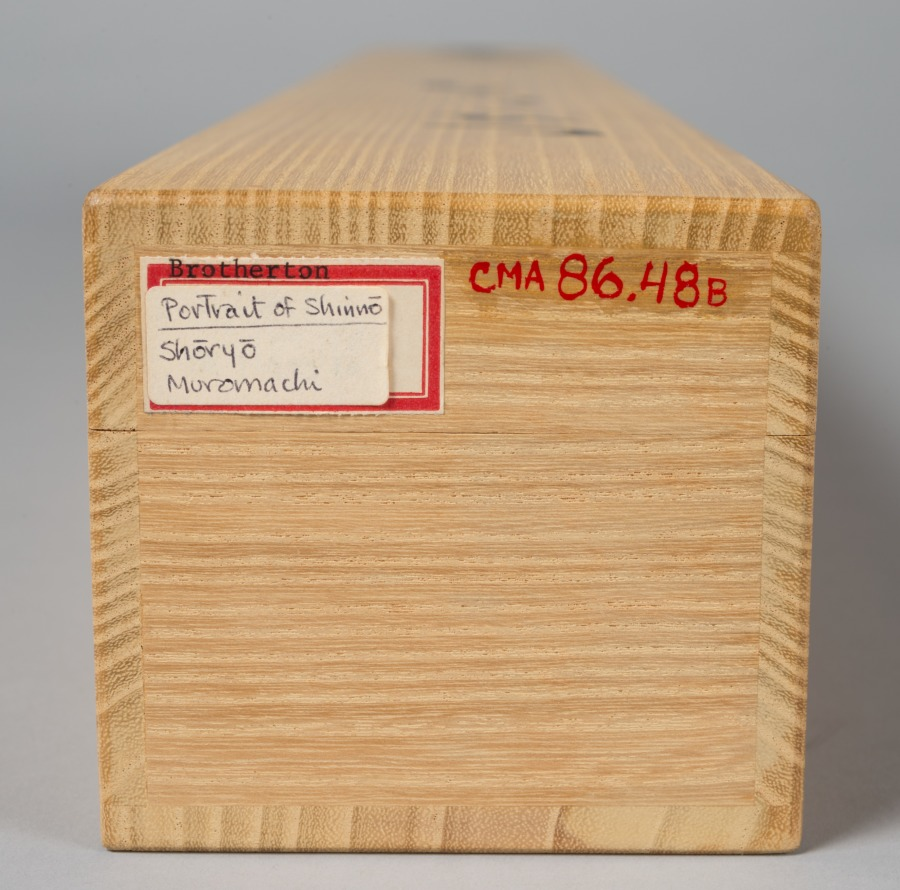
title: Shennong (Shinnō)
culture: Japan, Muromachi period (1392–1573)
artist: Shōryō (Japanese)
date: late 1400s–early 1500s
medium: hanging scroll; ink on paper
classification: Painting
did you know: Shennong legendarily taught people how to farm and also how to use plants as medicine.